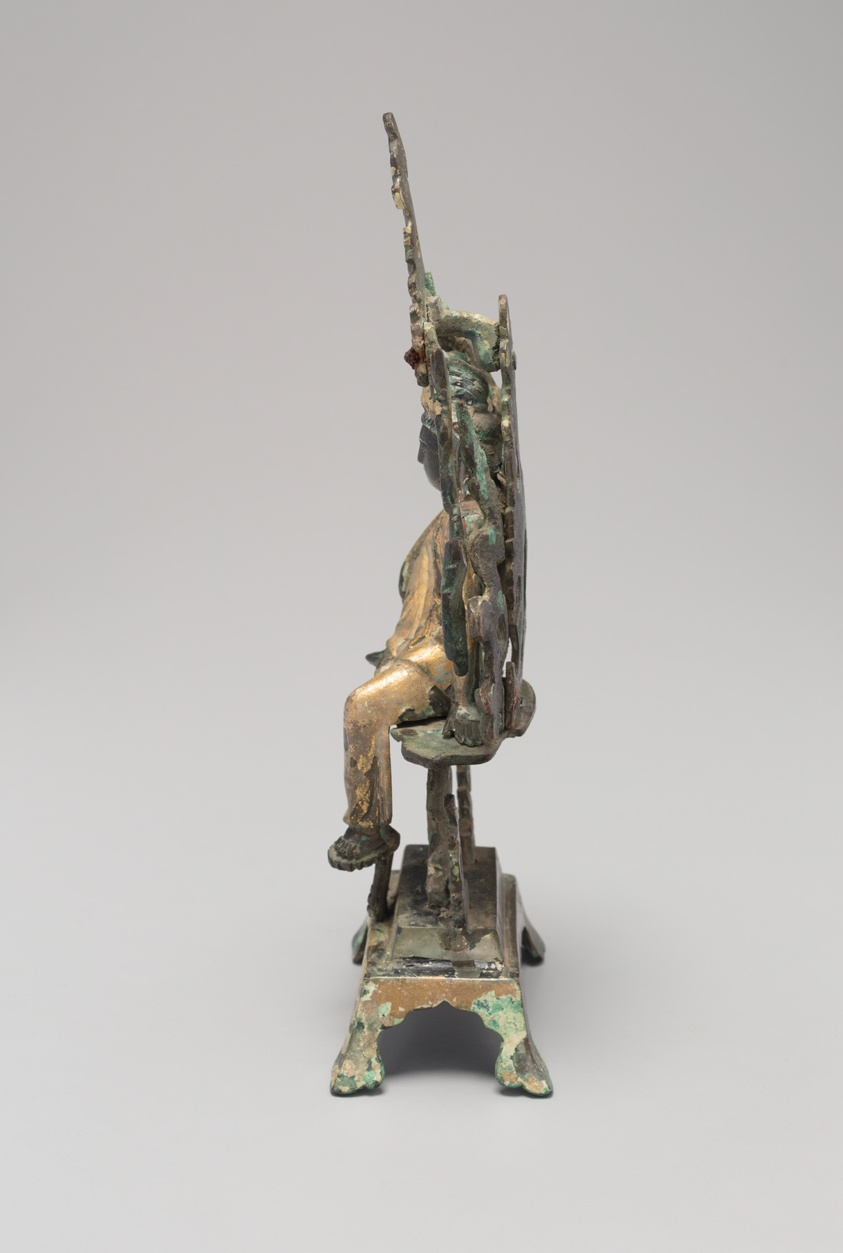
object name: Sculpture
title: South Sea Guanyin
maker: China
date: Song dynasty (960–1279)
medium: Gilt bronze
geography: China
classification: sculpture